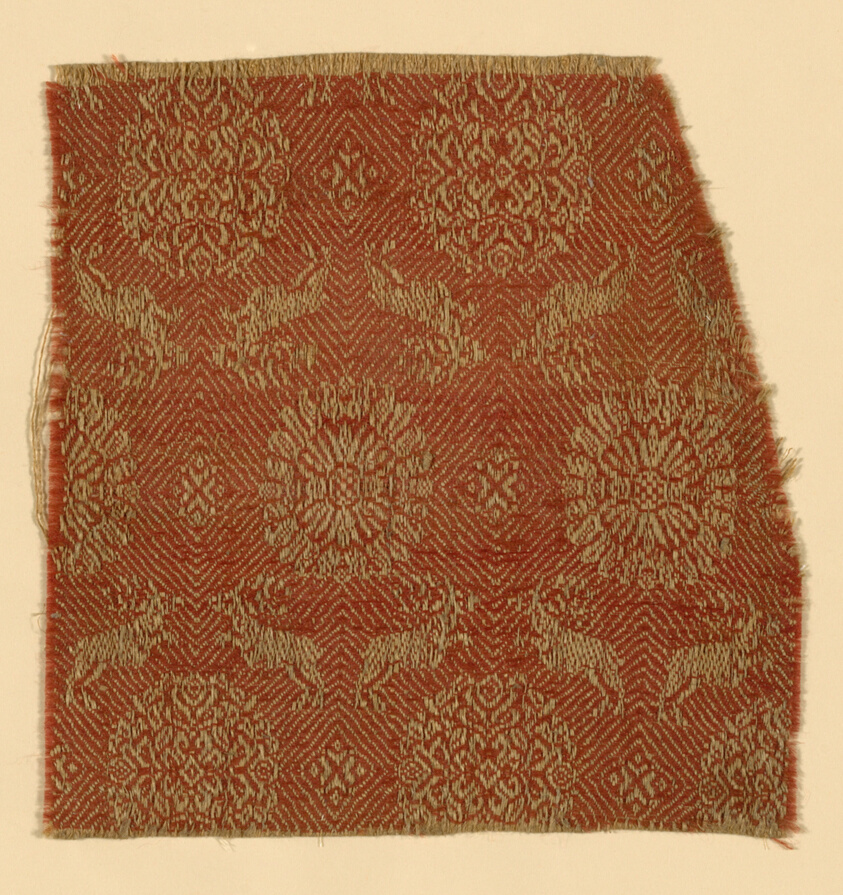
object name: Textile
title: Fragment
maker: Europe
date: 17th century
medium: Linen and wool, weft-float faced point twill weave self-patterned by main warp floats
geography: Europe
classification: textile; weaving